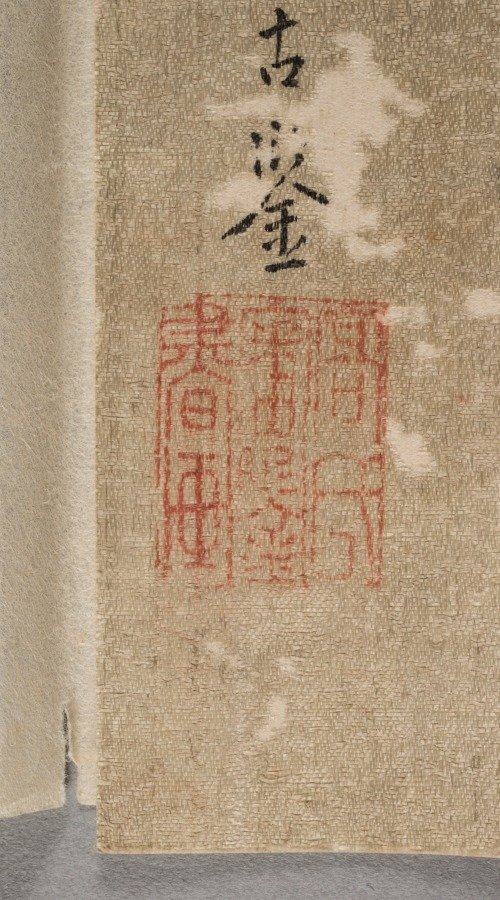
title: Landscape with Gentle Peaks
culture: Japan, Edo period (1615–1868)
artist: Kan Tenju (Japanese, 1727–1795)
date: 1767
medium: hanging scroll; ink and light color on paper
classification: Painting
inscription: 雨過嵐光煙／雲陽樹影諫／夕陽独在左／？卷讀残書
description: A figure sits in a retreat tucked into the mountains near a waterfall. The painter, Kan Tenju, was best known as a calligrapher and seal carver. Of Korean heritage, he was a patron of artist Ike Taiga (池大雅) (1723–1776), and a cousin of Taiga’s student Aoki Shukuya (青木 夙夜) (died 1802). His Chinese-style poem reads as follows: Smoky mist in the mountain reflects light after the rain, Sunlight passes through the clouds to cast shadows of the trees, Alone in the sunset, I read a well-worn book.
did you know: This painting combines image and calligraphy, connected by skillful brushwork.